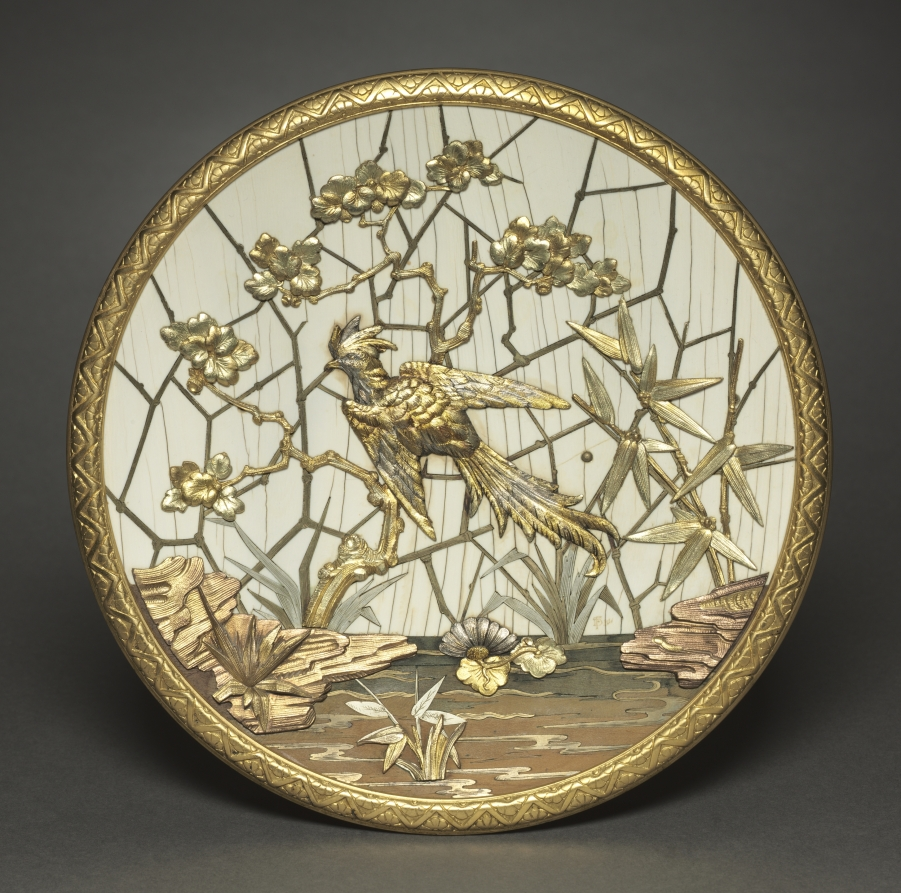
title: Plaque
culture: France, 19th century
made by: Veuve Ferdinand Duvinage (French)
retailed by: Alphonse Giroux (French)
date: c. 1880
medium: metal gilded in several colors of gold, silver-colored metal, ivory, wood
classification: Metalwork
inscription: engraved on back: ALPH GIROUX PARIS